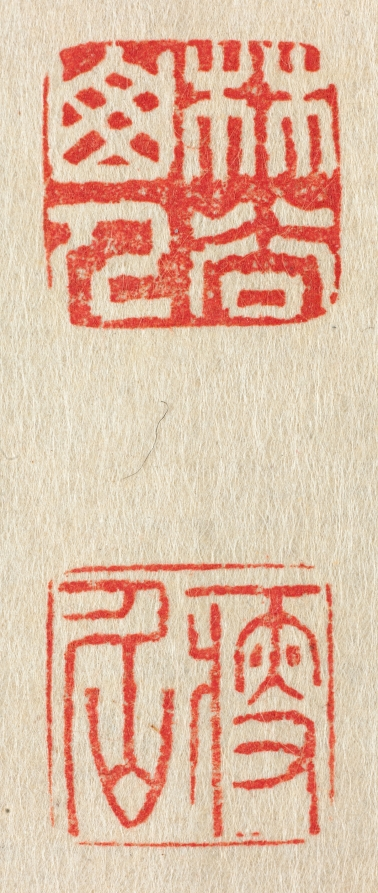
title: Chinese Seals and Poets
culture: Japan, Edo period (1615–1868)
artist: Hosokawa Rinkoku (Japanese, 1779–1843)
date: 1842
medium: handscroll; ink and color on paper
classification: Painting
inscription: Eight seal impressions are painted in red and alternate with sketchily painted figures. Artist's colophon at end of scroll.